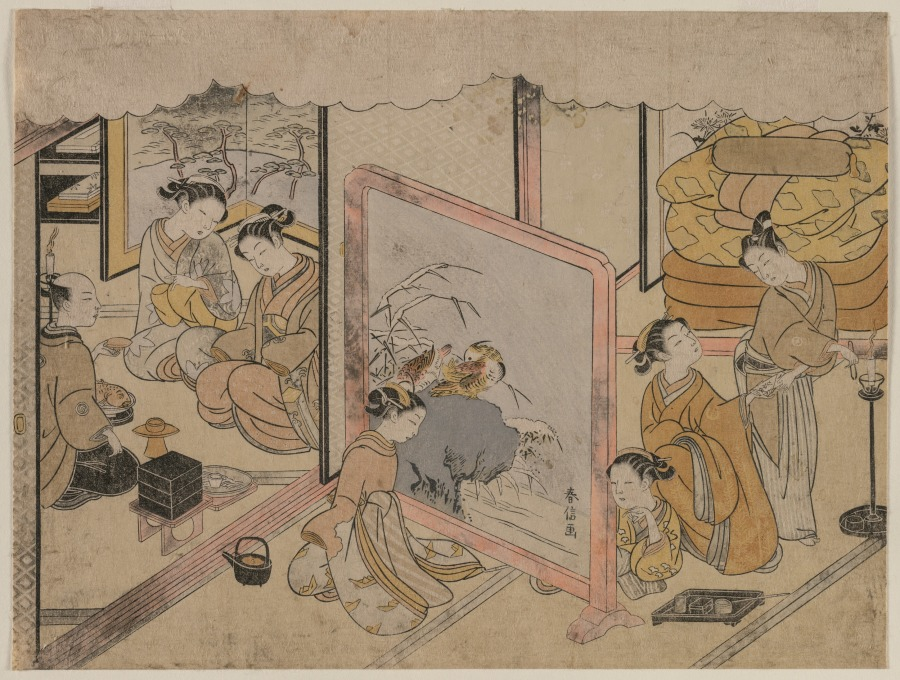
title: Drinking a Cup of Wine Before Retiring for Bed (From an Untitled Series)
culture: Japan, Edo period (1615–1868)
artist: Suzuki Harunobu (Japanese, 1724–1770)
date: late 1760s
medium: color woodblock print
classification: Print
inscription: Signature: Harunobu ga